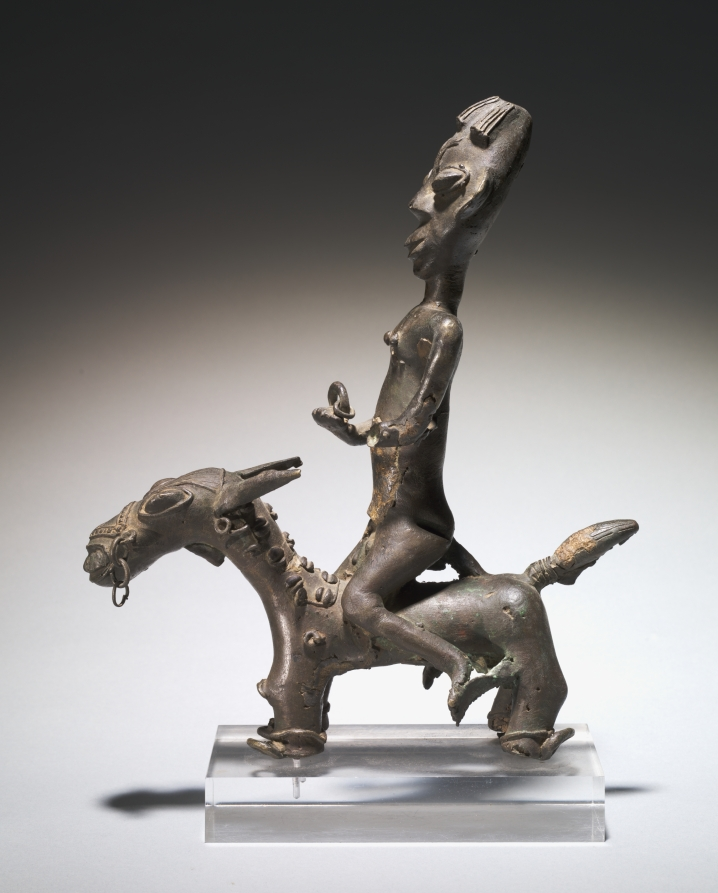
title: Altar figure (onílé)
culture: Africa, West Africa, Nigeria, Yorùbá-style maker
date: possibly 1700s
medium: Copper alloy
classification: Sculpture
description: This figure of a horse and rider is related to the Ògbóni society, whose responsibilities include the burial of titleholders and leaders and the judgment and punishment of criminals. A counterweight to the authority of the king, it is also responsible for the selection, installation, and removal of rulers. Probably once forming a pair with a female figure, the equestrian symbolized the king’s male ancestors.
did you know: Images of horses and riders cast in copper alloy are rare among Yoruba sculptures.